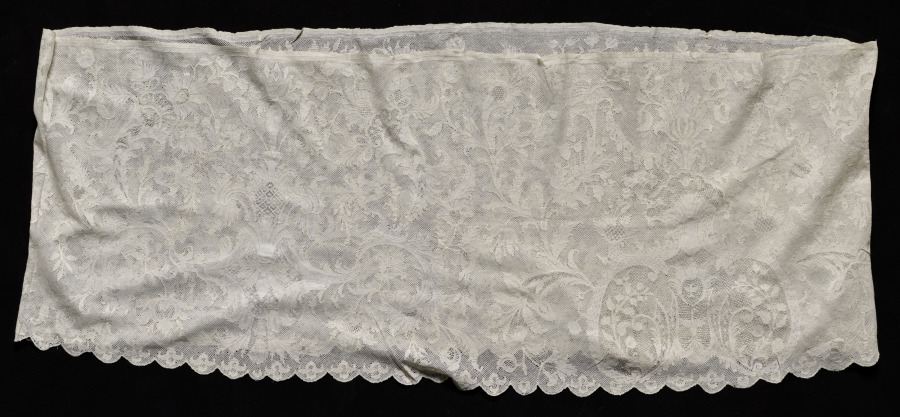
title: Lace Flounce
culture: Belgium (Flanders)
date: 1700–1720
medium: Linen: bobbin lace (mesh ground)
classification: Lace